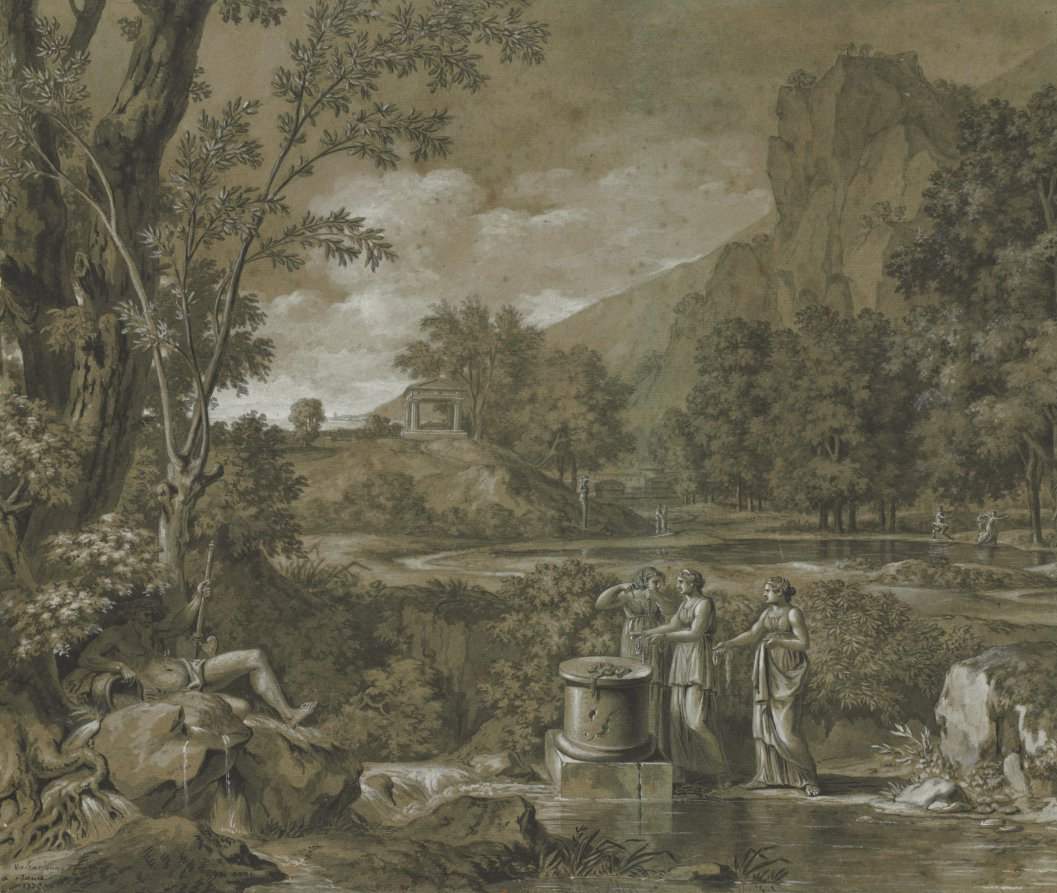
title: Classical Landscape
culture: France, 18th century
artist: Pierre Henri de Valenciennes (French, 1750–1819)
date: 1779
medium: black gouache and brush and gray wash, over black chalk and graphite, heightened with white gouache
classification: Drawing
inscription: signed, lower left, in brown ink: Valencienne Fecit / a Rome. 1779 / 1779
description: The leading landscape painter of the late 18th century, Pierre-Henri de Valenciennes was also an important theoretician whose book Elements of Practical Perspective influenced generations of French artists who followed. In the book, the artist described two ways of envisioning nature: "seeing it as it is," and "seeing it as it could be." He preferred the latter, believing that it demanded more of the imagination than merely copying the natural world. The perfection of the setting in this drawing reflects the noble, classical subject: three maidens cutting their hair and offering it on an altar to a river god.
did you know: The ritual seen here, in which women cut their hair and offer it to a god, is rarely depicted in the visual arts.